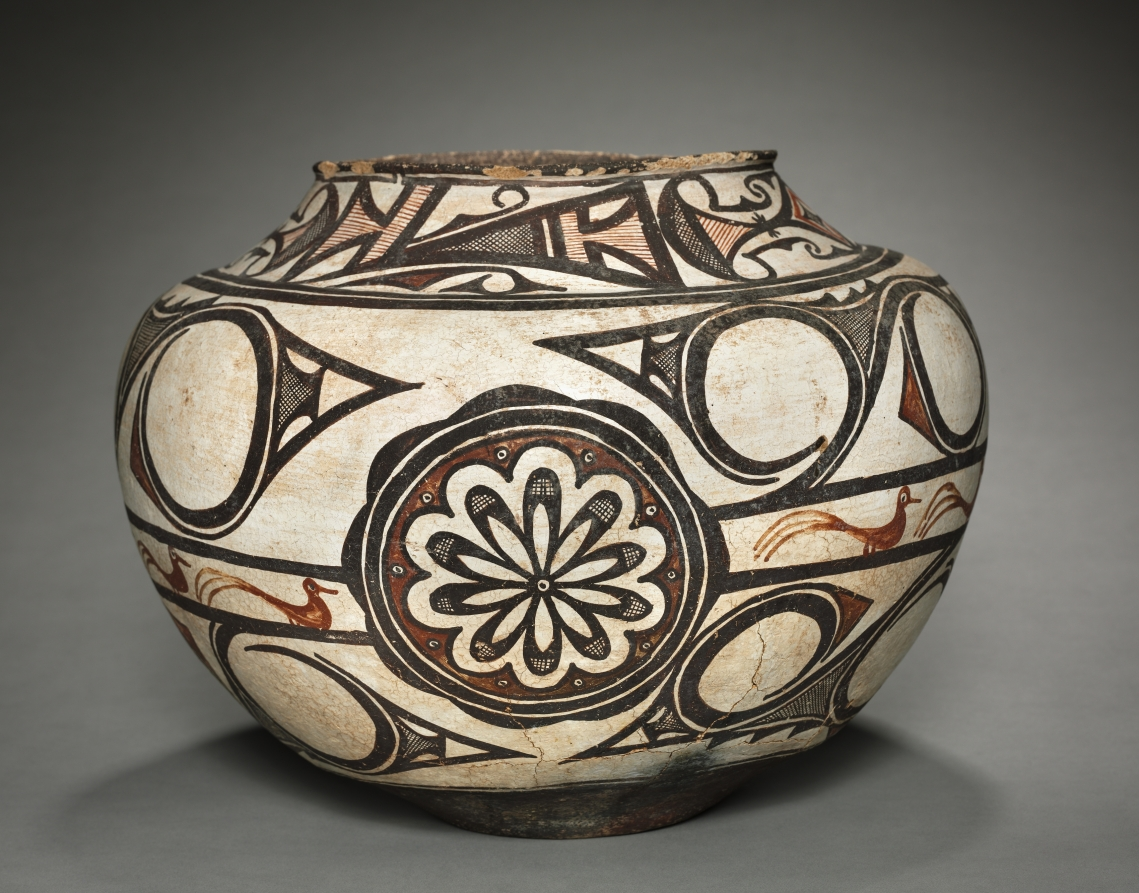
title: Water Jar (Olla) with Rosettes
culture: Native North America, Southwest, New Mexico, Zuni (A:shiwi) Pueblo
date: 1880s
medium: ceramic, slip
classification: Ceramic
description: In the past, motifs painted on Zuni (A:shiwi) ceramics likely held symbolic meanings but, if so, they are largely lost to memory—or at least the Zuni do not discuss them today. Where known, they seem to concern water, verdant crops, and abundant wildlife, also the focus of much Pueblo religious life. For instance, the large, triangular, blade-like forms around this vessel’s neck may represent the thunder knife used in many ceremonies. The petaled forms in circular rosettes refer to sunflowers.